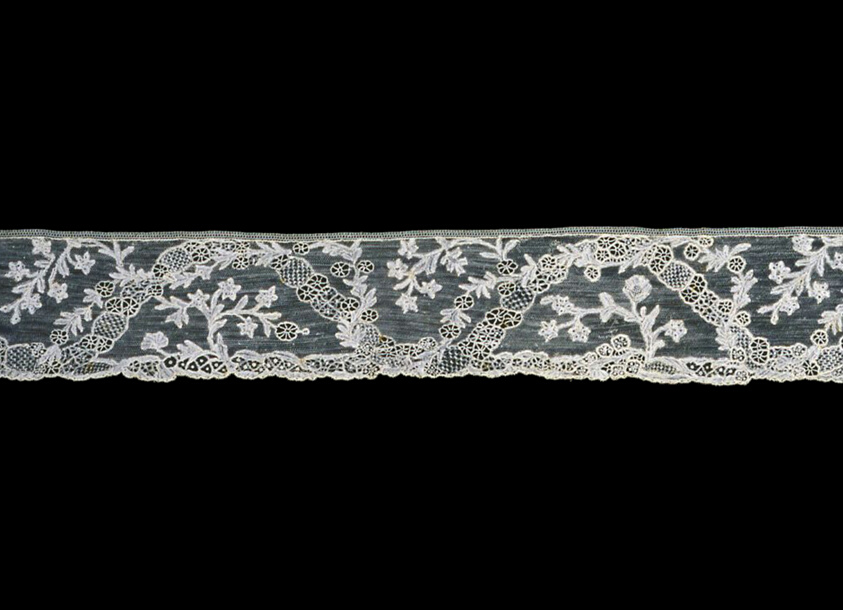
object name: Textile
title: Border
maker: Belgium, Flanders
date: 1760s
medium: Linen, needle lace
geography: Flanders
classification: textile; lace - needle